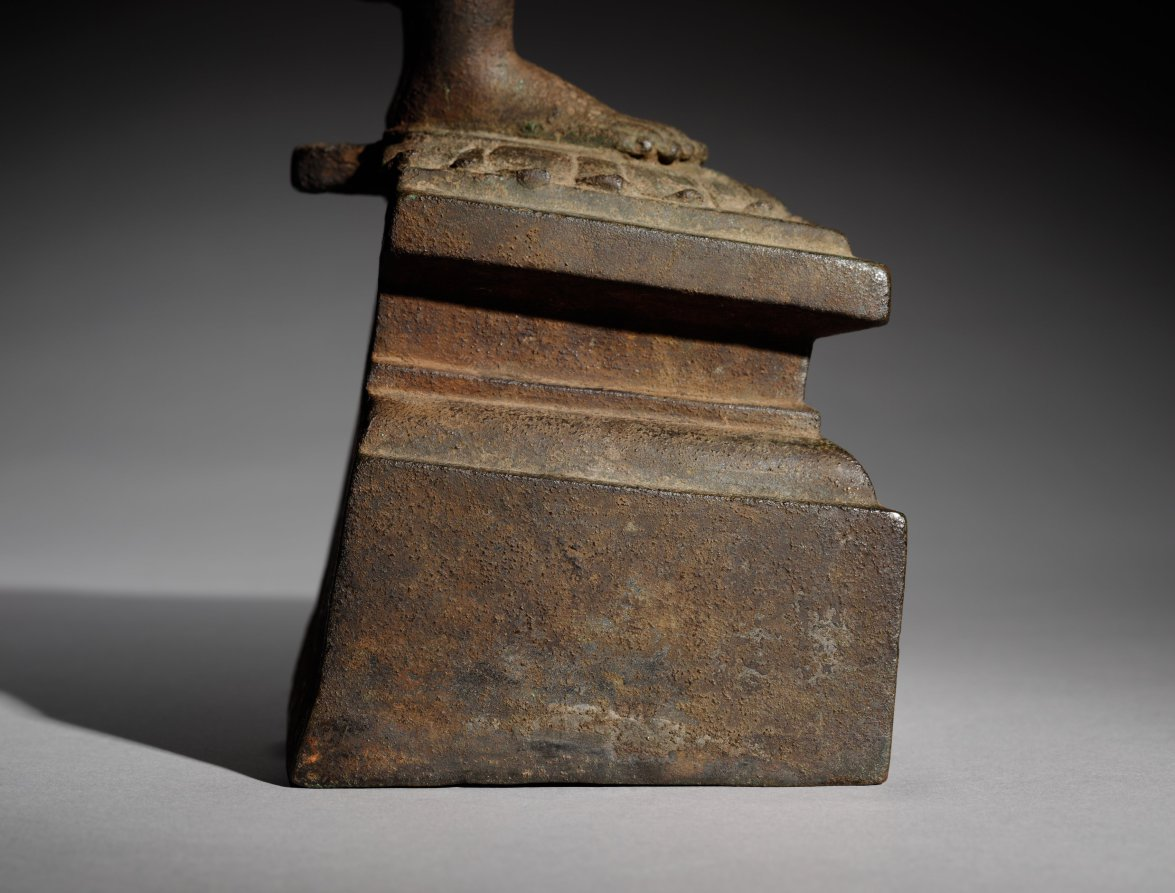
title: Standing Buddha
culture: Northern India, Uttar Pradesh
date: 591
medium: bronze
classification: Sculpture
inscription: 1. ṹ deyadharmmoyaṃ laḍitagrāme yaṃgvalvihāre śā[kya] bhikṣuṇyā 2. pariśuddhamatyā yadattra puṇyaṃ tadbhavatu sarvvasatvānā- 3. manuttarasarvva jñānāvāptaye/ / saṃvat 4a. 500 10 3/ / caityakūta jinabandhuvihārapūrvva-bhuddeśe 4b. piṇḍakena bhojanaṃ karttavya*/ / *Mistake for karttavyam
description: This bronze Buddha is exceptional, because it carries an inscription on its base that dates its manufacture to the year 591. According to the inscription, the sculpture was dedicated by a nun who was from a village in Nepal, but she probably commissioned it at a workshop in northern India. The Buddha's robe on this image has been left plain, without pleat lines to obscure the beauty of the contours of the body. Only the rippling scalloped clusters of the garment’s hem lend some sense of energy and subtle ornament to the composition.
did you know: Around the time when this sculpture was made, portable bronzes began to replace relics as the principal sacred commodity circulating in the Buddhist world.